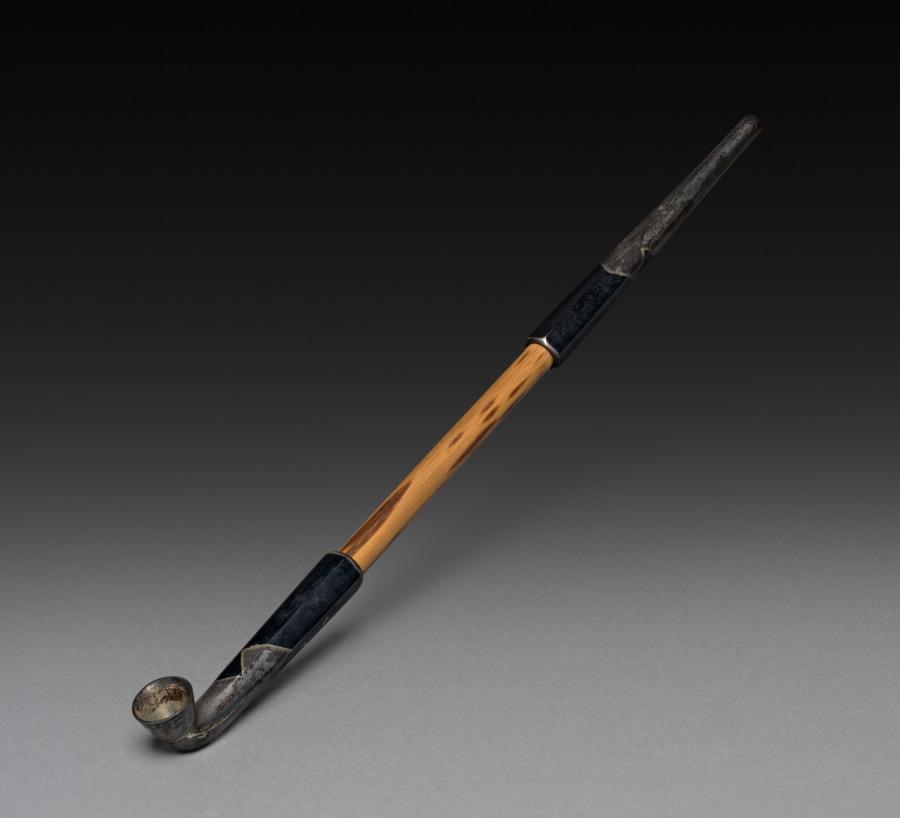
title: Tobacco Pipe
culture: Japan, Edo period (1615–1868)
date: 1700s to mid-1800s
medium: bamboo and metal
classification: Miscellaneous